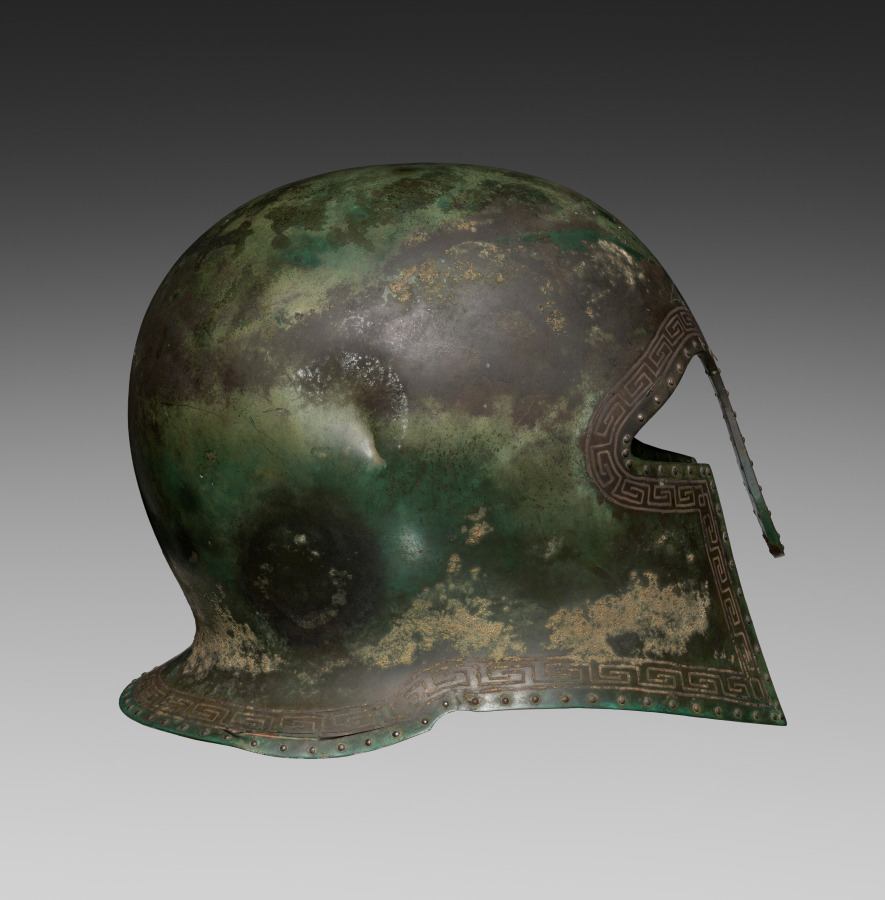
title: Corinthian Helmet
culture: Greece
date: 500–475 BCE or modern (before 1926)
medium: bronze with silver inlay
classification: Arms and Armor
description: Probably cast and then hammered into shape, this bronze helmet belongs to a type known as Corinthian, with almond-shaped eye holes, large cheekpieces, and a wide nose guard. Its significant weight raised early suspicions about authenticity, and although a 1928 technical examination found no conclusive evidence of forgery, scholars have continued to doubt its antiquity. Unusual details include the intact rivets, or metal fasteners, meant to secure liners; usually only their holes survive. The dueling warriors and inlaid palmette above the brow also find few parallels, and the silver meander pattern is unique. Most recently, a 2024 analysis found that both the copper and silver alloys of the helmet differ significantly from those expected in an ancient Greek helmet.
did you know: This helmet is very heavy—2.56 kilograms (5 lbs., 10 oz.), compared to average ancient helmets of 1.2–1.6 kilograms (about 3 lbs.).